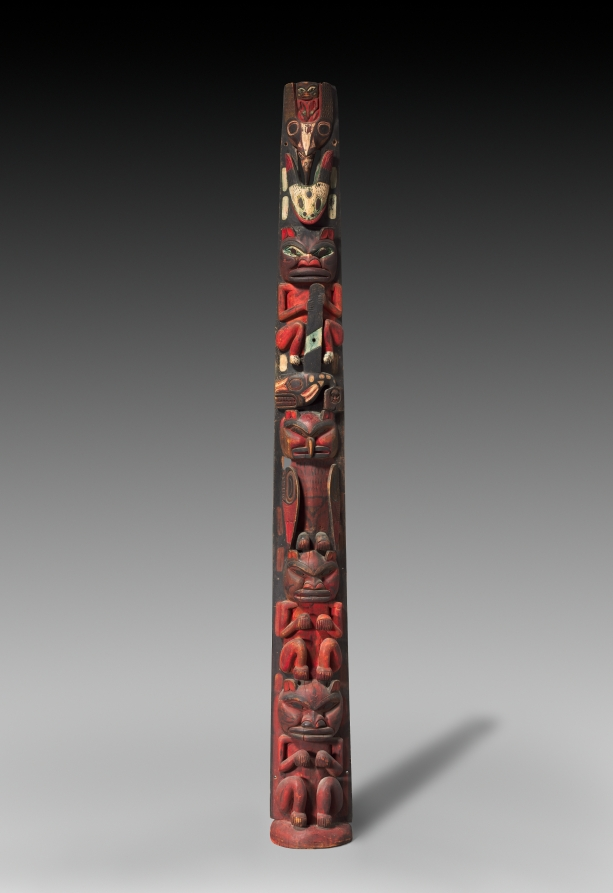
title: Totem Pole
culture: Northwest Coast, Tlingit, 19th century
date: c. 1880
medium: carved and painted wood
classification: Sculpture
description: Native American villages of the Pacific Northwest were marked by great totem poles that proclaimed the rank and ancestry of their owners. This small model pole was once owned by a Tlingit storyteller, a member of the coho salmon clan, of the raven tribe. Because the pole has been stored indoors, its carving and bright, original colors are undamaged by the elements. Reportedly, this totem pole illustrates several stories. Kushda-Kaw, the land-otter, is the pole's lowermost figure; above him is his wife. The wife transforms herself into an owl (the third figure from the bottom) and flies into the trees to keep watch. Kushda-Kaw then lies in wait to frighten and harass unwary passers-by. Above the owl is a finback whale carrying a friend out to sea for fishing. Near the top of the pole is a whale with red lips who has swallowed his enemy, the raven. The tiny figure at the pole's summit is a spirit-woman, the raven's lover. She will cut the whale open to rescue him.